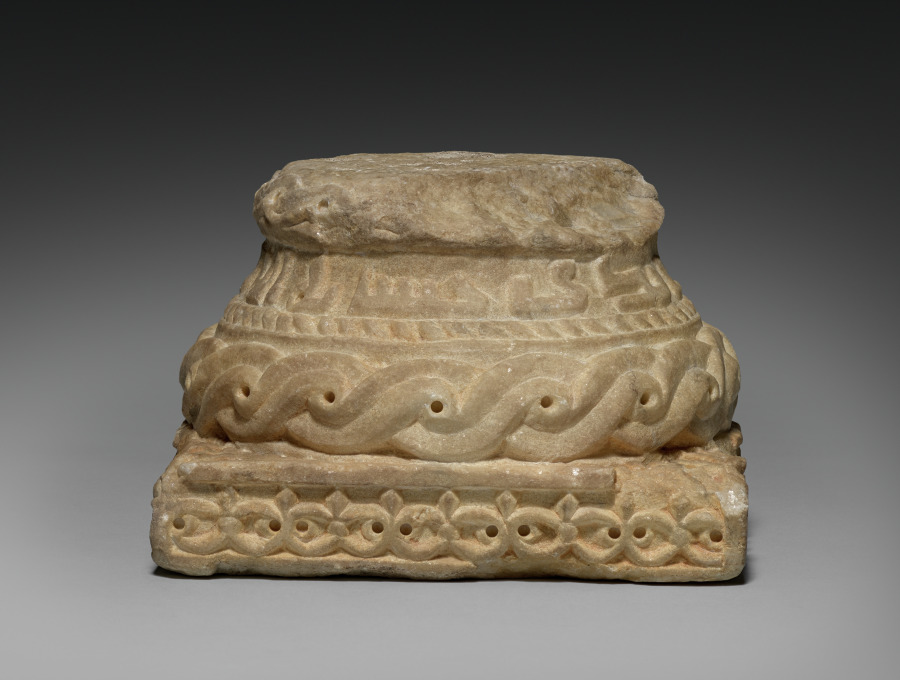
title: Column Base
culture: Spain, Cordoba, Spanish Umayyad period (756–1031)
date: c. 960–76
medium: Marble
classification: Sculpture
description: This base comes from the palatial city of Madinat al-Zahra near Cordoba (Spain) which was begun by caliph Abd al-Rahman III (r. 912–61) around 936. Large parts of the Iberian Peninsula were then under Islamic rule and experienced a cultural flowering. The city, destroyed already in 1010, was the most magnificent palace complex in Europe at the time.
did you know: In the mid-1800s the ruins of Madinat al-Zahra were rediscovered and the source of great fascination as people imagined a palace like that in the stories of 1001 Nights.